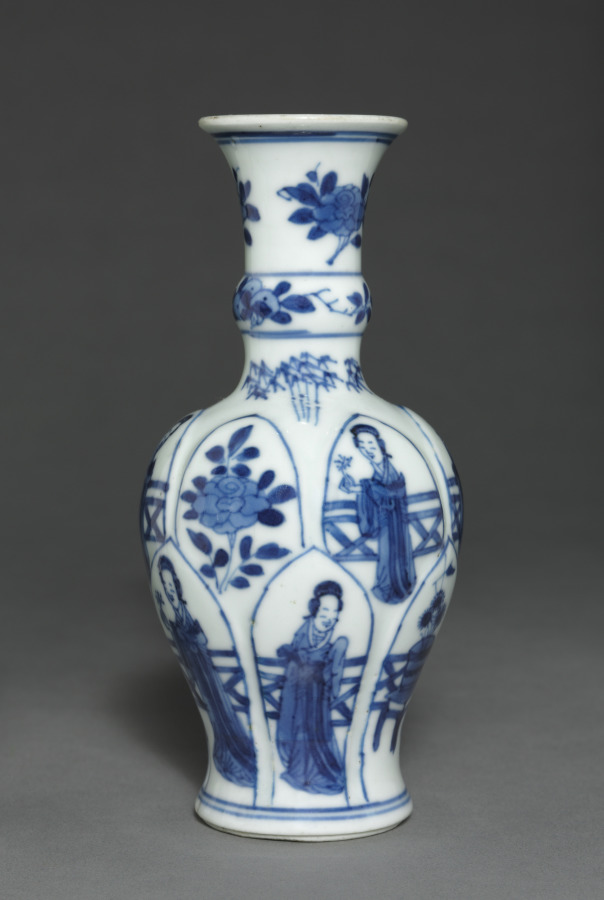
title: Vase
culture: China, Qing dynasty (1644-1911)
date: 19th Century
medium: porcelain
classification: Ceramic